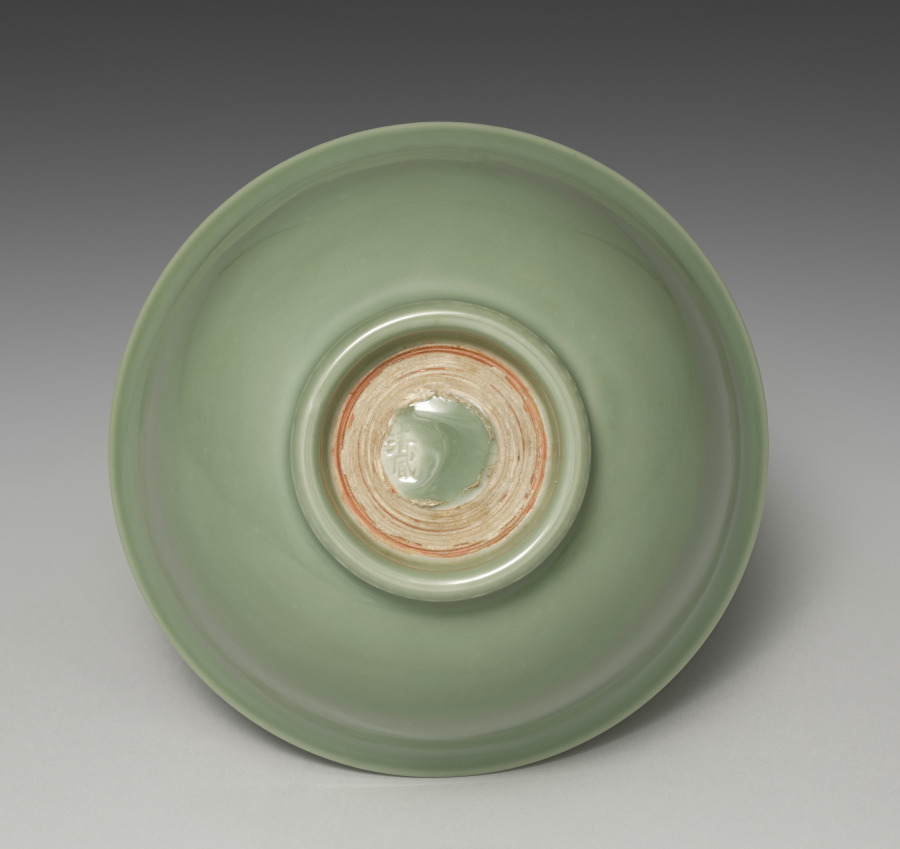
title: Dining Bowl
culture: Japan, Meiji period (1868–1912)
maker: Seifū Yohei III (Japanese, 1851–1914)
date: 1912–14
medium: Porcelain with green glaze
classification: Ceramic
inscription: 共箱の箱書：（蓋表）秘色彩古磁盂（印：清風）；（蓋裏）清風制之（印：帝室技藝員）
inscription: 彫銘：清風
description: This Yohei III dining bowl with an everted rim has a glaze identified in its box lid inscription as hisoku (C. mise), or “mysterious color.” This name typically refers specifically to a type of high-quality, green-glazed ceramic produced in the ninth and tenth centuries at the Yue kilns in China’s Zhejiang Province as tribute ware for the imperial family.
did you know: Many ceramics created by the Seifū Studio refer to and emulate Chinese ceramics in form and glazing.